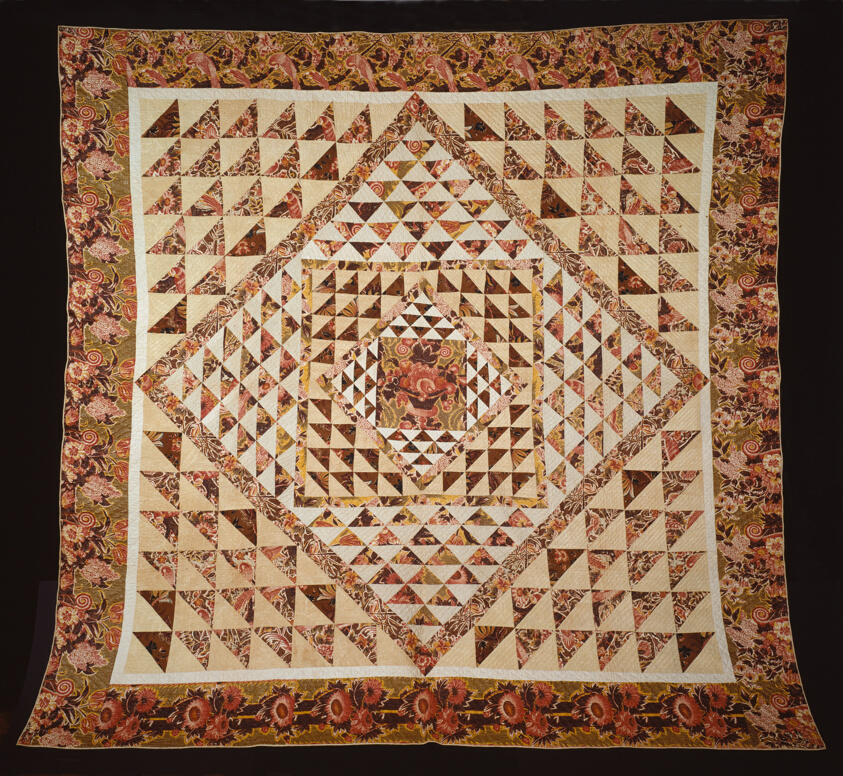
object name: Textile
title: Bedcover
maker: United States or England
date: 1820/50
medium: Cotton, variety of plain weaves; some roller printed; some glazed; pieced; quilted with cotton thread; backed with cotton, plain weave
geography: United States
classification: needlework - quilt; textile